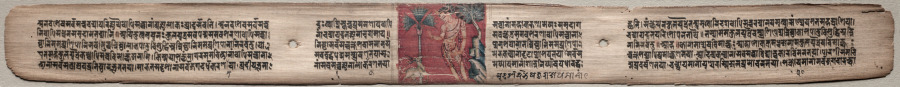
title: Sudhana and an antelope, folio 73 (recto) from a Gandavyuha-sutra (Scripture of the Supreme Array)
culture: Nepal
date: 1000–1100s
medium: gum tempera and ink on palm leaf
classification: Painting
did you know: The deer has four horns, identifying it as the four-horned antelope (Tetracerus quadricornis), native to Nepal and India.